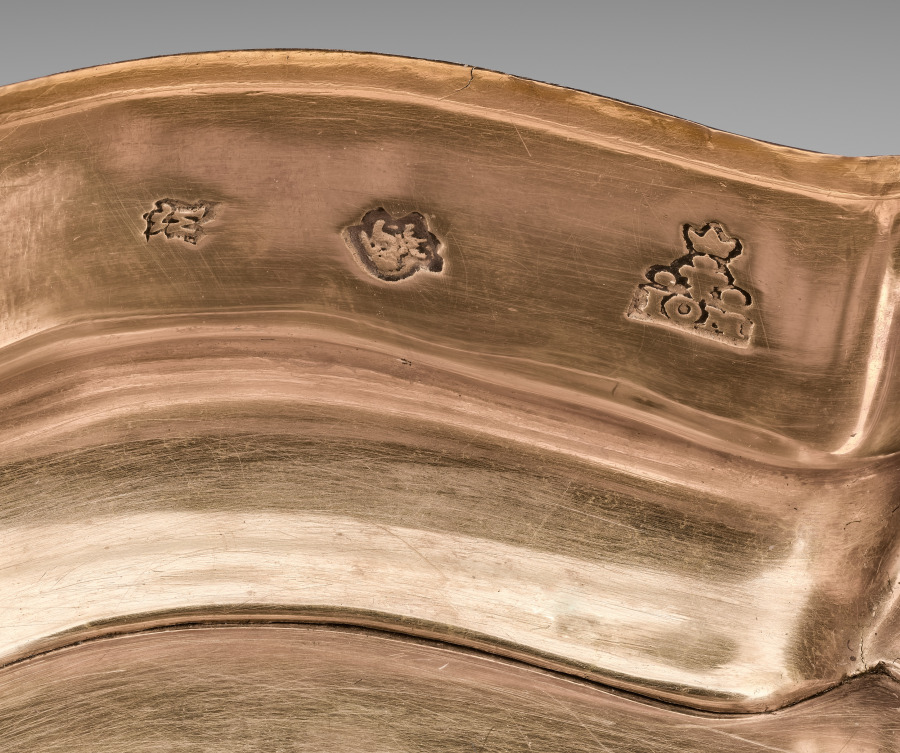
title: Gold Box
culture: France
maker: Juste-Aurèle Meissonnier (French, 1695–1750)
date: 1728–29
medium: gold and lapis lazuli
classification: Metalwork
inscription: IOM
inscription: a crowned M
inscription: a crowned dolphin's head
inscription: a crowned chancellor's mace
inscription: double frame eagle's head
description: With its central cartouche, heavy molding, and fluted sides, the design of this box attests to Juste-Aurèle Meissonnier’s interest in architecture. The box is further distinguished by a strong sense of movement, achieved through its dynamic contour, extraordinary level of detail, and the dramatic contrast between gold and lapis lazuli. Such small boxes, known as snuffboxes, were used to hold scented powdered tobacco that was inhaled through the nostrils. Made of precious materials and highly ornamented, they conveyed the owner’s wealth, fashion awareness, sophistication, and social standing. These personal, collectible items were often presented as luxurious gifts. This box was made for the dowager Queen of Spain, Maria Anna of Neuburg, whose coat of arms – along with that of her late husband, Charles II – features on the cover.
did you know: This is one of the two known objects that bear the maker's mark of Meissonnier.